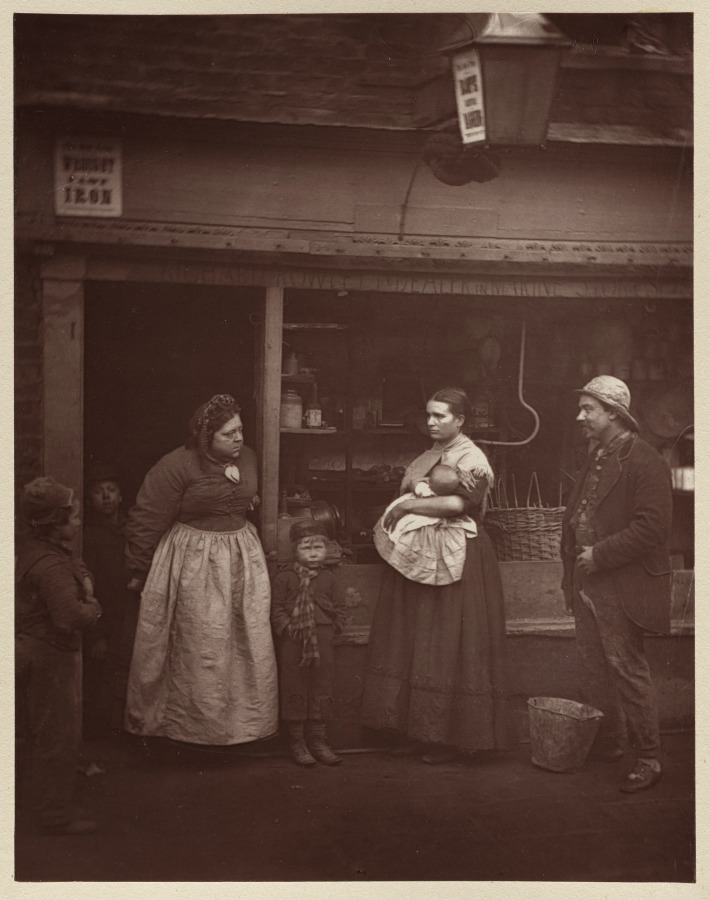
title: Sufferers from the Floods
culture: England, 19th century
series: Street Life in London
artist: John Thomson (Scottish, 1837–1921)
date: 1877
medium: woodburytype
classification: Photograph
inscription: Stamped in red ink on recto of mount: “SUFFERERS FROM THE FLOODS.”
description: Smith and Thomson decided to photograph the once-prosperous Rowletts in front of the rag shop that they owned and lived in to show that the floods caused long-term financial losses and health problems that drove even the middle class into poverty. The woman with the baby lived in the house next door; her entire family suffered constant colds and rheumatism from the persistent dampness.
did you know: Annual tidal overflow of the Thames River flooded less prosperous areas of London, leaving behind “a trail of misery . . . and a damp, noxious, fever-breeding atmosphere.”